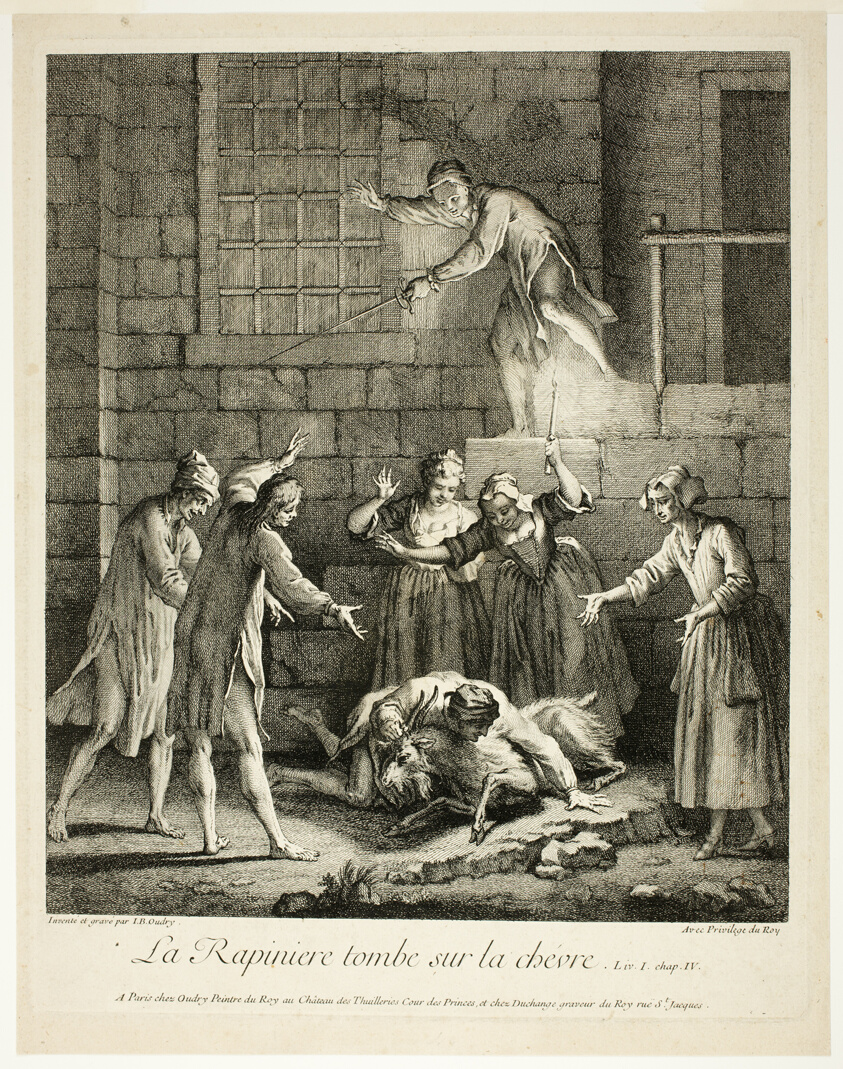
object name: Print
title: Comic Stories: The Plunderer Falls on the Goat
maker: Jean-Baptiste Oudry (French, 1686-1755)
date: 1726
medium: Etching on cream laid paper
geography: France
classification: etching; print; prints and drawing